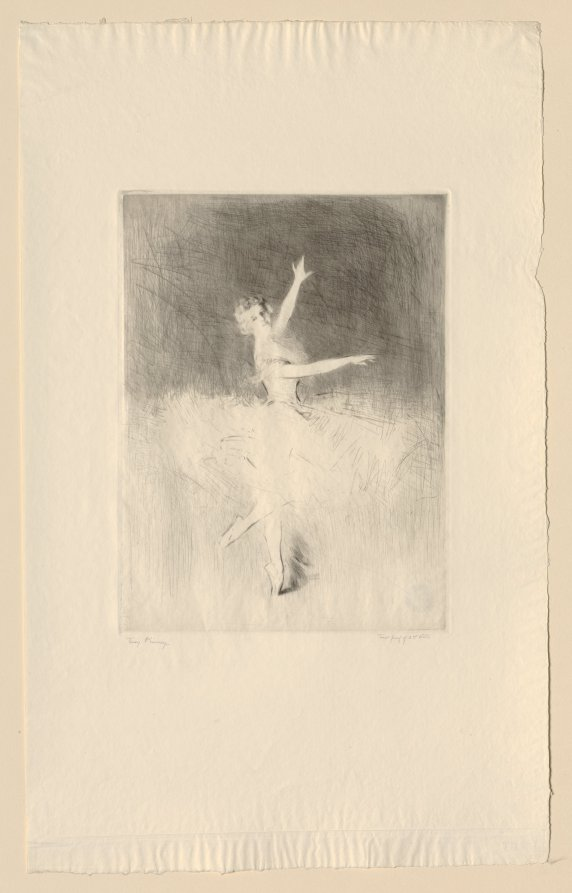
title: Adeline Génee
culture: America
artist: Troy Kinney (American, 1871–1938)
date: c. 1915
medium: etching and drypoint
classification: Print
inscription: Signed in pencil on bottom left beneath image: Troy Kinney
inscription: Signed in pencil on bottom right beneath image: Trial proof of 2nd state